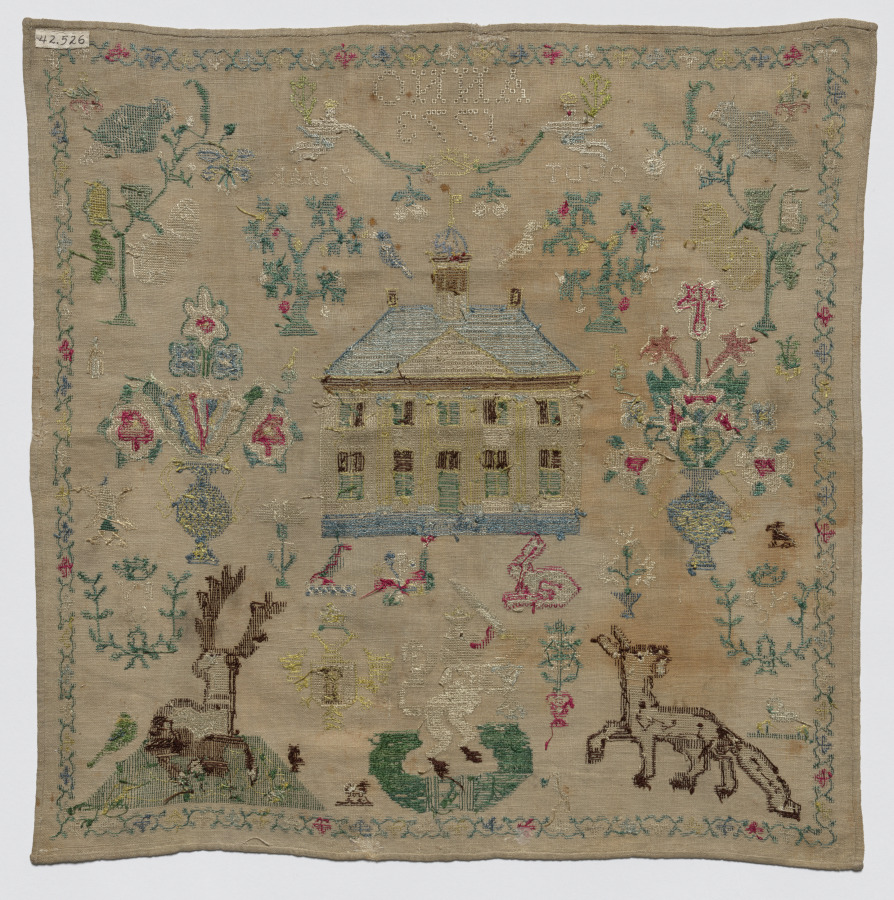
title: Sampler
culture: Netherlands, late 18th century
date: 1773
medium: embroidery; silk on cotton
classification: Sampler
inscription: above house in center: "ANNO/ 1773"; to left of this: "OUDT 9"; to right: "JAAR" (ninth year); enclosed in wreaths in lower section: "M.B.C." and "B.Y.S.S."